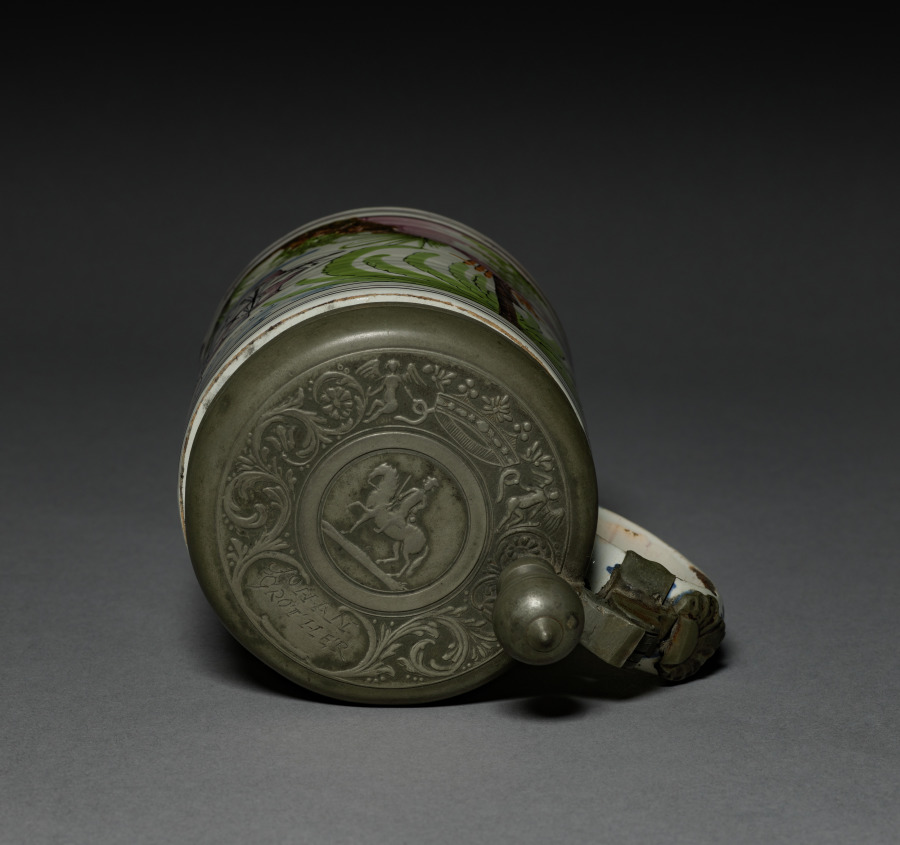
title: Tankard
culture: Germany, Aumund (Vegesack), 18th century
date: c. 1750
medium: faience with pewter cover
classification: Ceramic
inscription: inscribed on pewter cover: "Johan/Grother" (probably name of first owner).